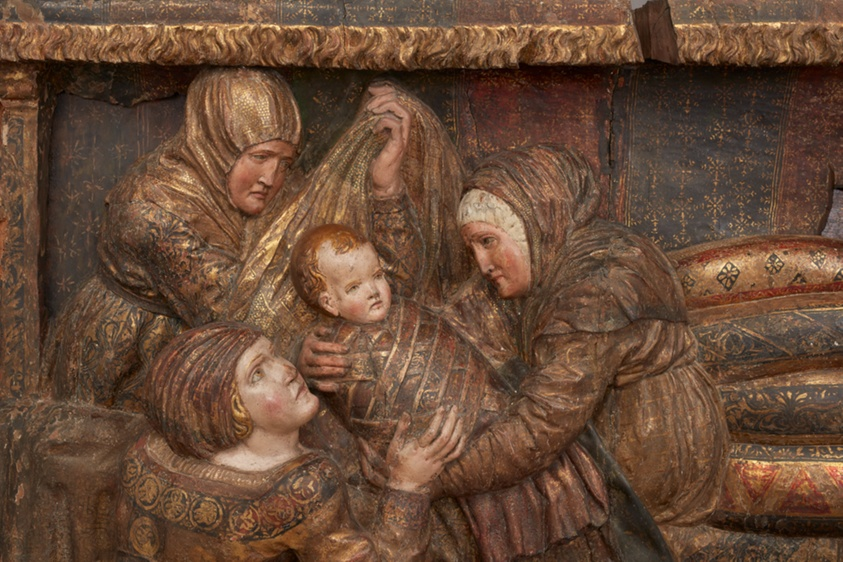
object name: Sculpture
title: The Birth of Saint John the Baptist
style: sixteenth century, 16th Century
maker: Artist unknown (Spanish (Burgos), active 16th century)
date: c. 1525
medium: Wood, polychromy, and gilding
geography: Spain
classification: relief; sculpture; sculpture/wood; spanish; wood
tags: religious scenes, bed, fire, women, woman, babies, birth, Christianity, Christian subjects, Saint John the Baptist, saints, religious figures, religious, religion